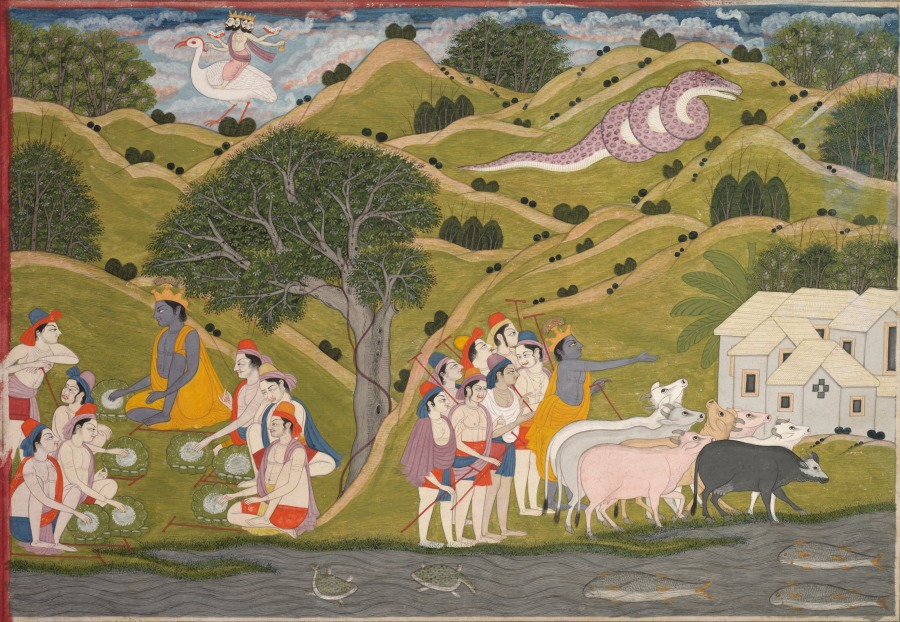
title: Krishna returns with the cowherds to Braj, from a Bhagavata Purana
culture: Northern India, Pahari kingdoms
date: c. 1830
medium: Gum tempera and ink on paper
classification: Painting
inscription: On the back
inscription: 14 dhiai, 56 pehla deobhe bhojan chhak ke brindaban bich aaye mor mukut tang ke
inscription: chitra 56 adhyah 10 chitra 2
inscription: Natvabhishtam Jagddhata Svadhama Pratyapadyat [indented]: Ucushca Srihayadah Krishnam Svagatam Tehtiramhasa Nekopyabhoji Kavala Ehiya Sadhu Bhujyatam. 44 Tato Hasan Hashikeshobhyavahritya Saharbhake Darshayam Shracharmajagaram Nyavartat Vanad Vrajam.45 Evam Vihare Komare Komaram Jahaturvraje. Nilayane Setubandhermarkatotplavanadibhi. 60 [in red]: Iti Srimadbhagvate Dashamaskande Purvardhe Brahamstutirnam Chaturdashodhyay. 14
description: The painting is based on Chapter 14 of Book 10 of the Bhagavata Purana in which the god Brahma hides the cowherds and calves of Krishna. After realizing his mistake and witnessing the divine prowess of Krishna, Brahma extols Krishna and returns to his abode while Krishna and his fellow cowherds enjoy a hearty meal and then return to Braj.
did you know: On the left the scene of the picnicking herd boys shows them eating rice on banana leaves, while on the right they drive the cows home.